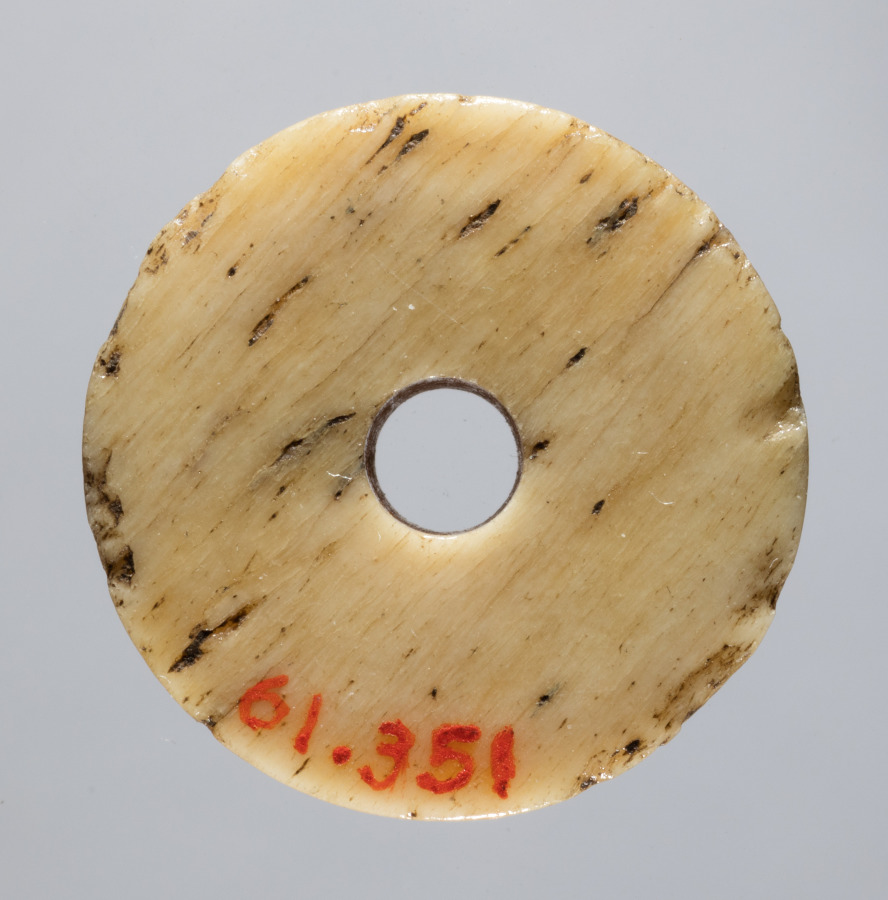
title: Spindle Whorl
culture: Iran, early Islamic period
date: 700s - 900s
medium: bone, incised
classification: Spindle Whorl